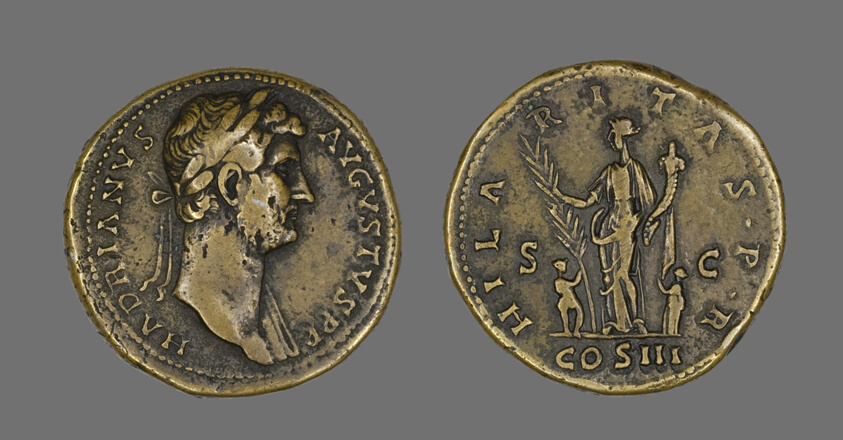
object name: Coin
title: Coin Portraying Emperor Hadrian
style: imperial (roman), ancient, roman (ancient, style or period)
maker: Roman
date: 117-138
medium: Bronze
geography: Roman Empire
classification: coin; ancient art